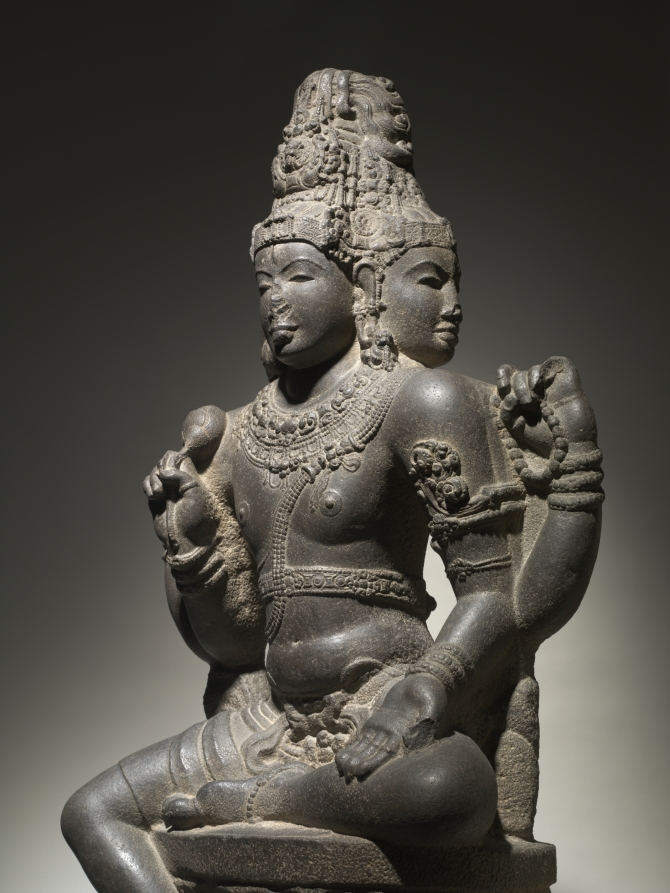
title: Brahma-Shiva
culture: South India, Tamil Nadu, Chola dynasty, late 10th - early 11th century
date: late 900s–1000s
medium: granite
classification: Sculpture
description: In the Hindu pantheon Brahma is in charge of carrying out the work of creation. In this tour-de-force of South Indian temple sculpture, he is in a special regal aspect, with the only elements of his typical priestly appearance being the prayer beads and the matted dreadlocks piled on his head. Four arms connote superhuman power, and four heads convey the idea that his creative activities spread in all four directions. His upper right hand enjoins freedom from fear, and the lower holds a lotus bud associated with birth and the process of creation. His lowered left hand is held in the gift-giving gesture, suggestive of the gift of creation he will bestow upon the world.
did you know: The back of the sculpture retains the original textured surface from a pointed chisel, suggesting it was in a niche or near a wall, protected from worshippers’ touches.